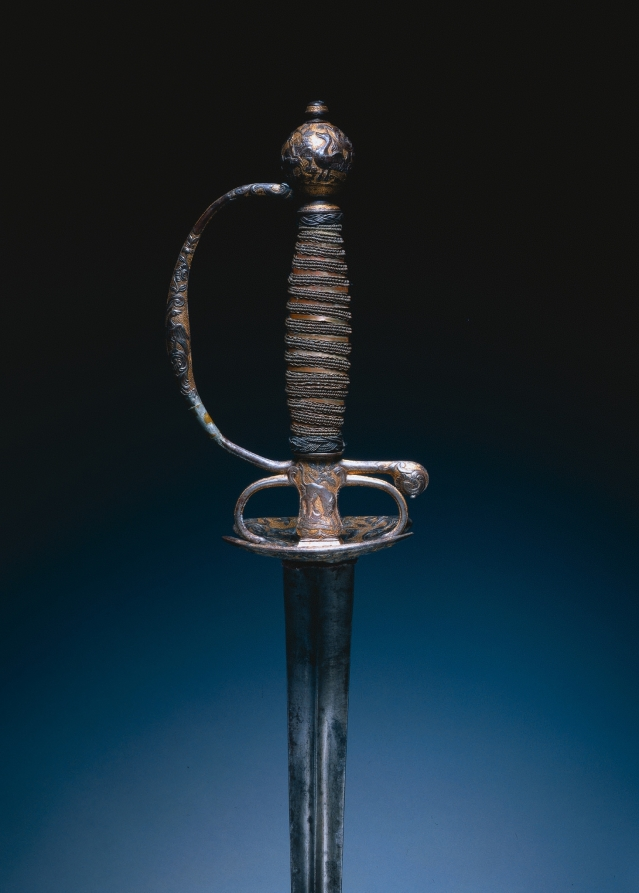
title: Small Sword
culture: France, Paris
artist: after a design by Jean-Baptiste Oudry (French, 1686–1755)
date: c.1750–60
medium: steel, gilt and russeted, copper, wood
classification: Arms and Armor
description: The hilt, pommel, and guard of this sword are richly chiseled in low relief against a stippled gold background with animals (dogs, a stag, ducks) that appear to be adapted from paintings by Jean-Baptiste Oudry (1686–1775). An elegant court sword such as this was an important accessory to a gentleman's attire, yet remained functional—it could be withdrawn for an impromptu duel.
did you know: Although fully functional, this sword was used more for show—a perfect accessory for a fashionable gentleman having his portrait painted.